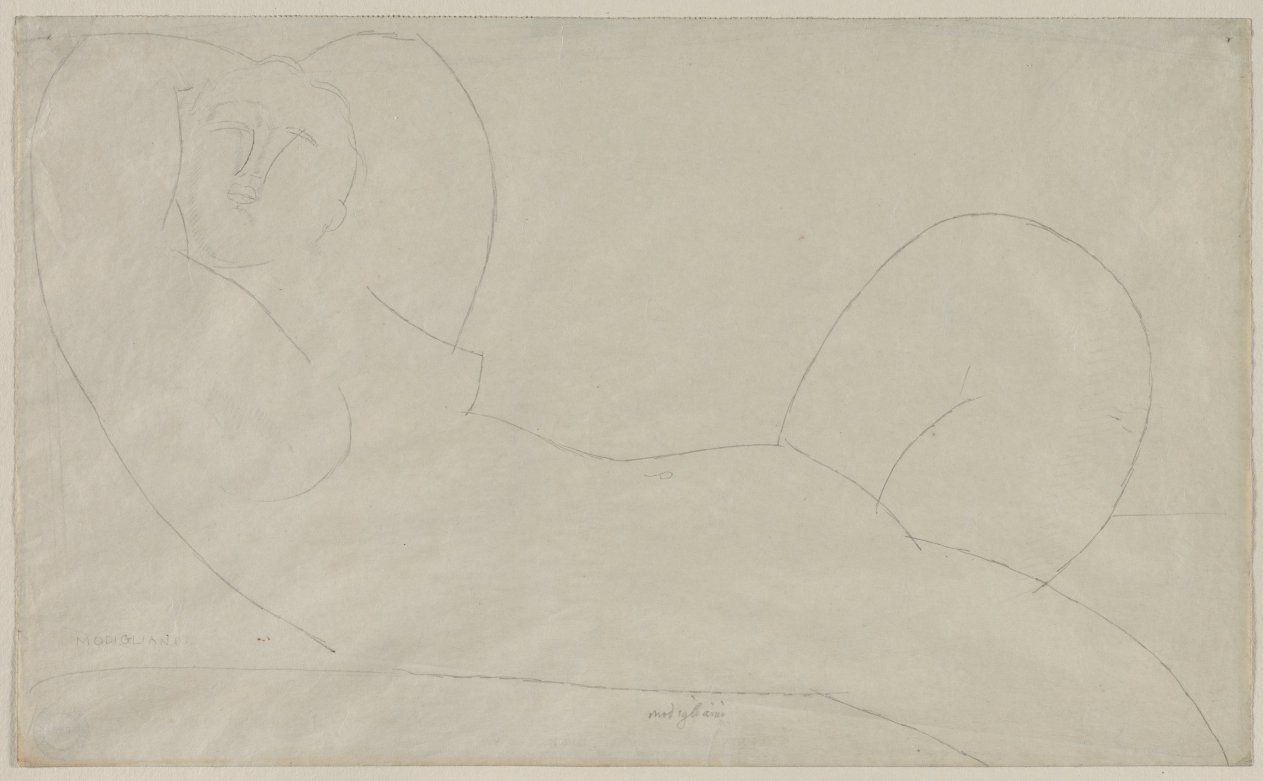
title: Reclining Female Nude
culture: Italy, 20th century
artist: Amedeo Modigliani (Italian, 1884–1920)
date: 1914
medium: graphite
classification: Drawing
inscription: signed, lower left, in graphite: MODIGLIANI ; signed, lower center, in graphite: modigliani ; VERSO, upper right, in graphite: 25583 [upside down] ; center, stamped in purple ink: PHOTO [sideways] ; FRAGMENT OF OLD MOUNT (now removed), in top half, (printed label): [illegible] [GA]LLE[RIE]S / [illegible]80 FIFTH AVENUE / BETWEEN 53RD AND 54TH STREETS / NEW YORK / ESTABLISHED 1885 ; across center, in black typescript: "Nude" [underlined] / Drawing by / Amadeo Modigliani ; center left, in brown ink on a sticker: 245[illegible][9?] / [rew?] ; in bottom half, in blue crayon: 25583 ; FRAGMENT OF OLD MOUNT(now removed), upper right, (printed label): 1929 ; upper left (printed) N° ; across center, in brown ink: 25583 / Modigliani / Nu bra levés / A.V. [all crossed out with two blue lines] ; bottom right, in graphite: X ; FRAGMENT OF OLD MOUNT (now removed), upper left, (printed label): N° ; across center, in brown ink: 25583 / Modigliani / nu bras levés [all crossed out with two pink lines] ; bottom left, in orange crayon: 3000 [underlined]